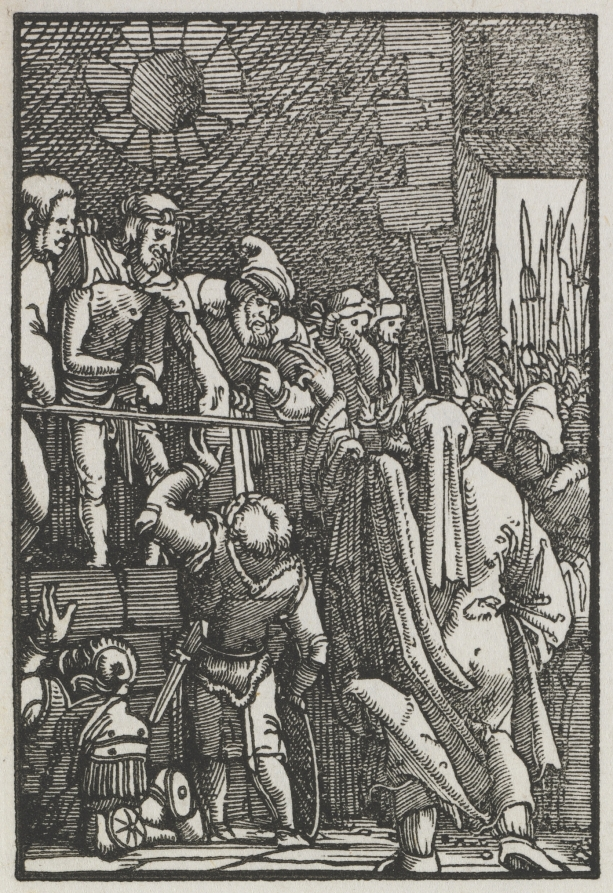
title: The Fall and Redemption of Man: Ecco Homo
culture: Germany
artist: Albrecht Altdorfer (German, c. 1480–1538)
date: c. 1515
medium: woodcut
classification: Print